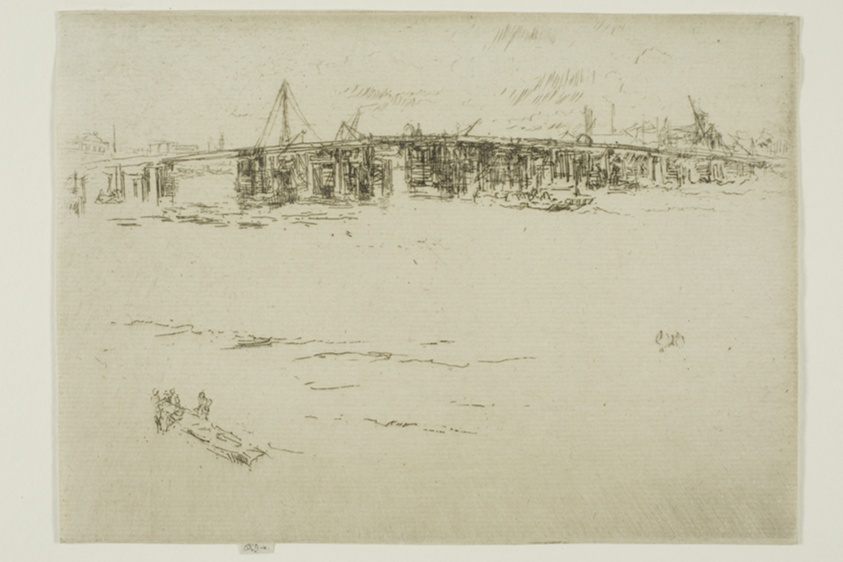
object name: Print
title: Old Battersea Bridge, No. 2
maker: James McNeill Whistler (American, 1834-1903)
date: 1887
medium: Etching and drypoint with foul biting in brown ink on cream laid paper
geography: United States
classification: etching; foul biting; print; prints and drawing; drypoint; paper